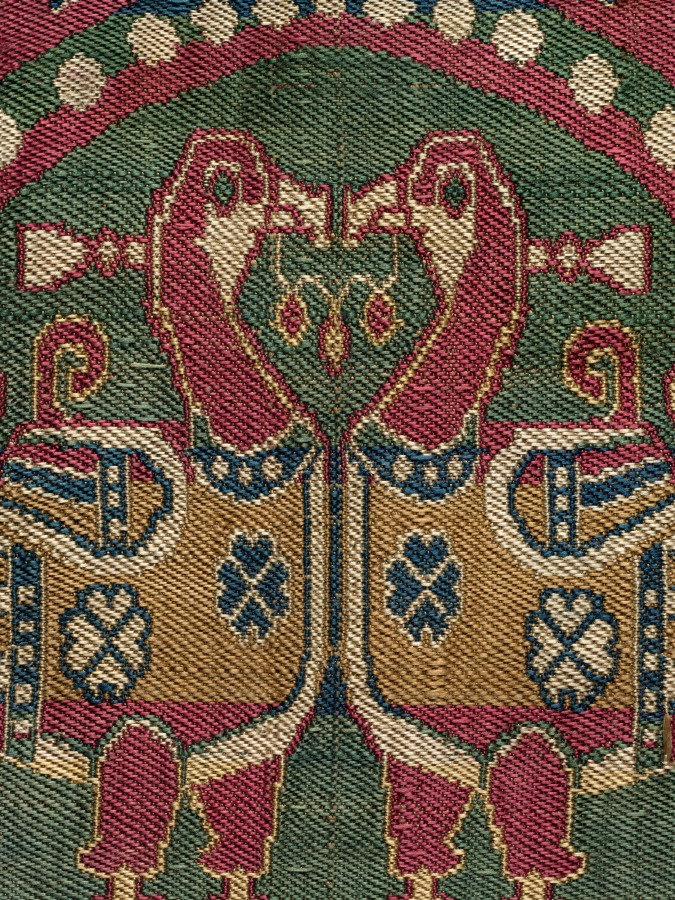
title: Child’s Coat with Ducks in Pearl Medallions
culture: Probably Sogdia (present-day Uzbekistan); China, Tang dynasty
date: 700s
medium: Silk: weft-faced compound twill weave (samite)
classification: Garment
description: The coat’s outer fabric is woven in five brilliant colors featuring paired ducks in pearl roundels, hallmarks of the precious and highly desired silks from Sogdia. The coat’s inner lining is a twill damask with a floral pattern made in China. The combination of Sogdian and Chinese silks in one garment with Tibetan ownership history is evidence of the vital exchange and cultural interaction among the peoples living along the trade routes of the Silk Road. This precious coat was presumably made for a Tibetan prince. Given the coat’s pristine condition, though, it is unclear whether the garment was ever worn, or was used as a diplomatic gift or perhaps as currency.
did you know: This coat is part of a set of garments that originally included an outer pair of pants and silk boots made from the same fabric.